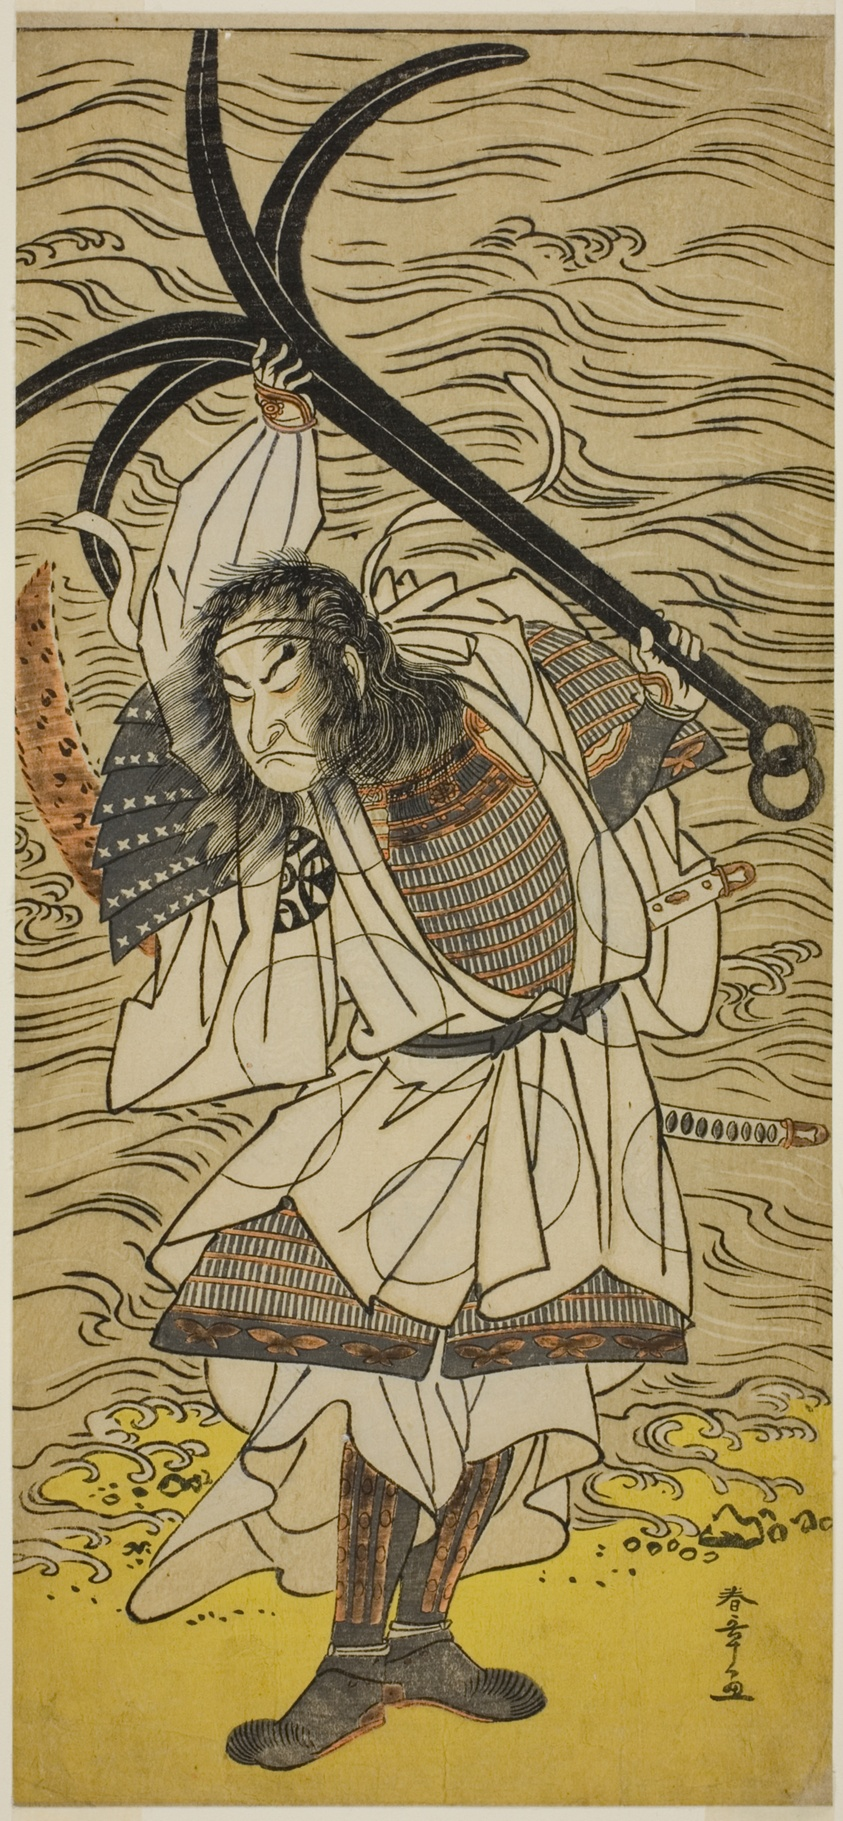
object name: Print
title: The Actor Nakamura Nakazo I as Taira no Tomomori Disguised as Tokaiya Gimpei, in the Play Yoshitsune Sembon-zakura, Performed at the Morita Theater in the Fourth Month, 1777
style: Japanese (culture or style)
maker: Katsukawa Shunsho 勝川 春章; Japanese, 1726-1792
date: c. 1777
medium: Color woodblock print; hosoban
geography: Japan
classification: woodblock print; print; asian art